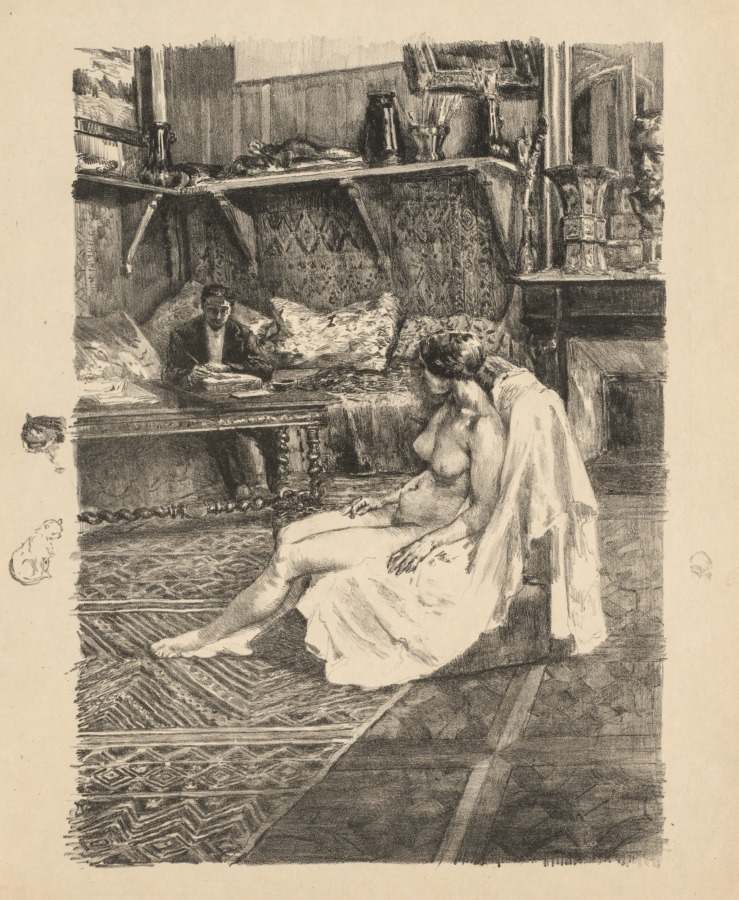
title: The Model Session (La Séance de modèle)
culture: France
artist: Alexandre Lunois (French, 1863–1916)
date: c. 1895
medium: lithograph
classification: Print